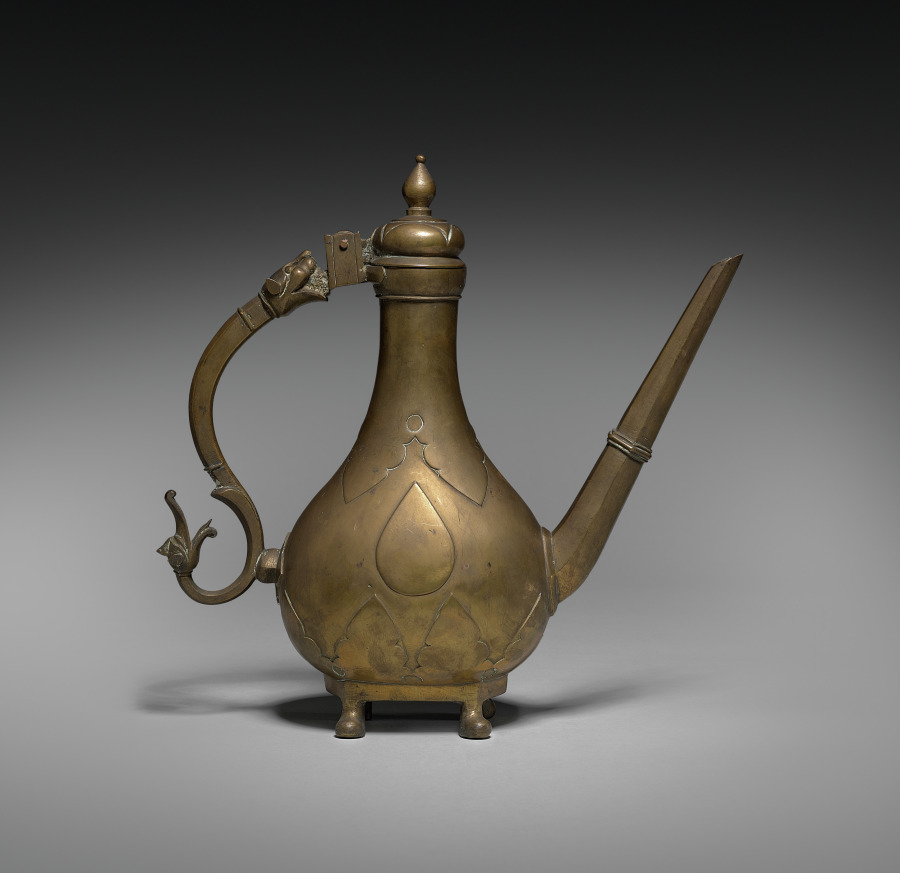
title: Vessel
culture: India, Benares, 19th century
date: 1800s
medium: brass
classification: Metalwork